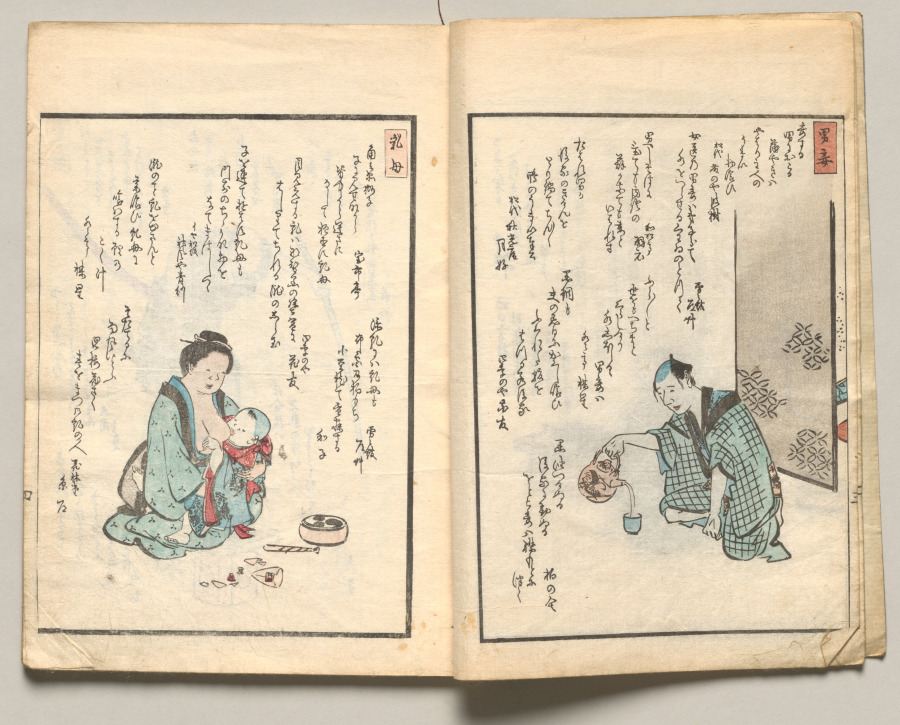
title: Spread Four from Volume Four of People of Japan in Light Verse (Kyōka)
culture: Japan, Edo period (1615–1868)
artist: Utagawa Hiroshige (Japanese, 1797–1858)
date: 1857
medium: Woodblock-printed book; ink and color on paper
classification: Bound Volume